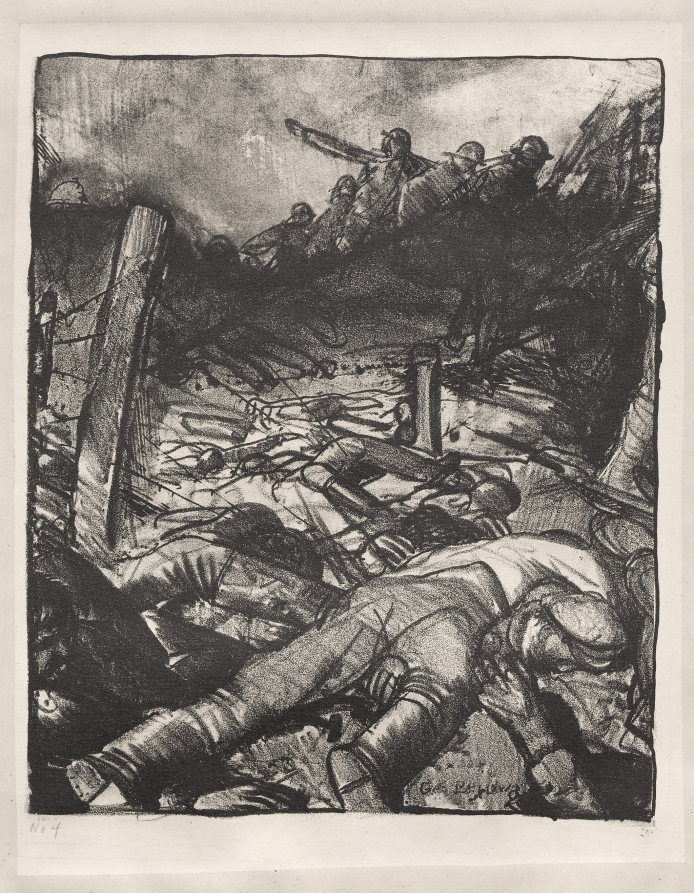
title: War Series: The Charge, Left Detail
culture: America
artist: George Bellows (American, 1882–1925)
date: 1918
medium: lithograph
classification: Print